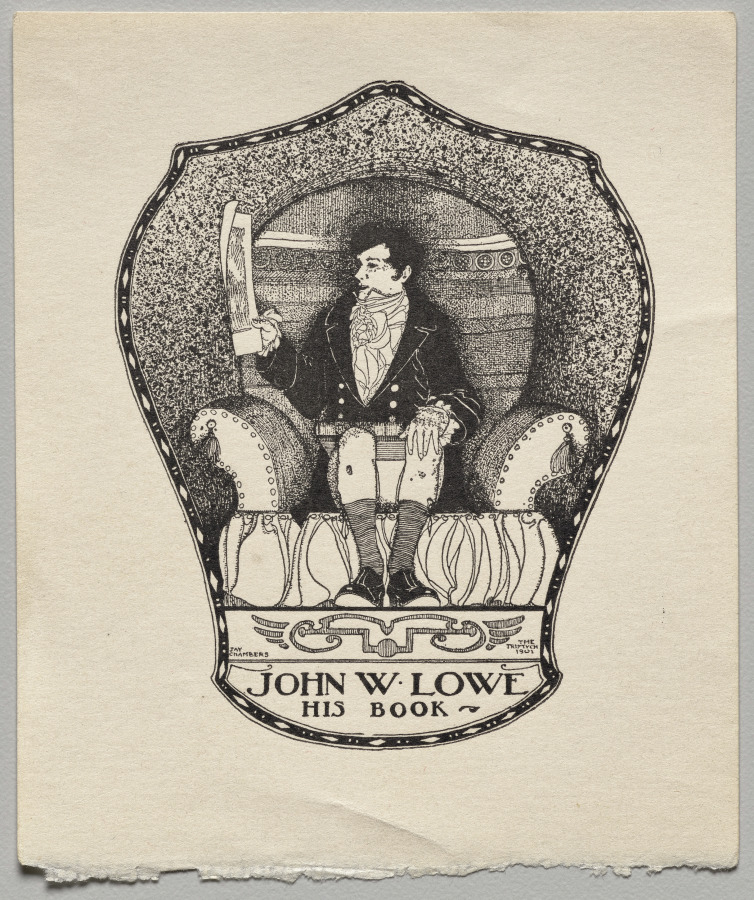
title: Bookplate: John W. Lowe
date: 1901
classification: Print